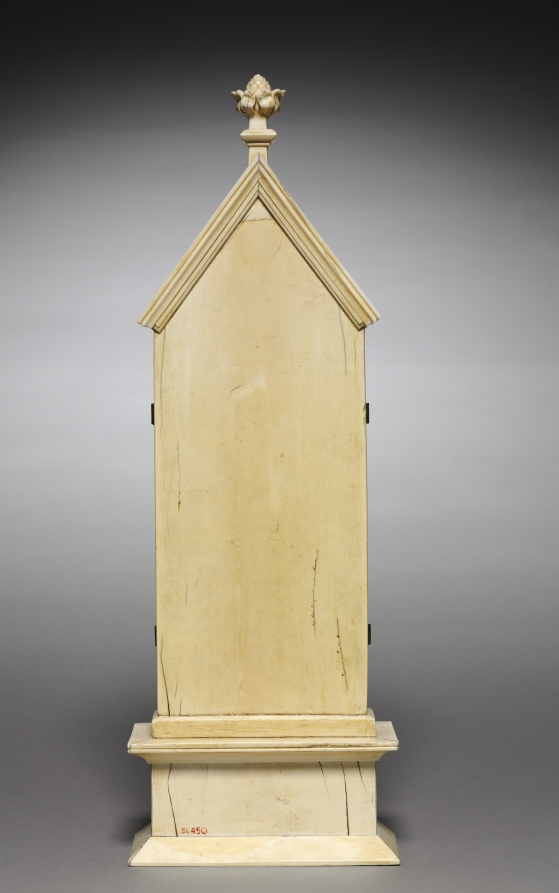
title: Triptych: The Life of the Virgin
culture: France, Lorraine?, or Austria?, Gothic period, 14th century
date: c. 1325–1350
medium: ivory, traces of gilding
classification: Ivory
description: The Virgin and Child, standing beneath a three-part arch, occupy the central plaque of this triptych. On the wings are carved four scenes from the life of the Virgin: the Annunciation, the Visitation, the Adoration of the Magi, and Christ's Presentation in the Temple. By the end of the 12th century, devotional objects like this became widespread in many parts of Western Europe as a result of the growing cult of the Virgin.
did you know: The pinnacle, roof moldings, and base are modern additions attached before the object entered our collection.